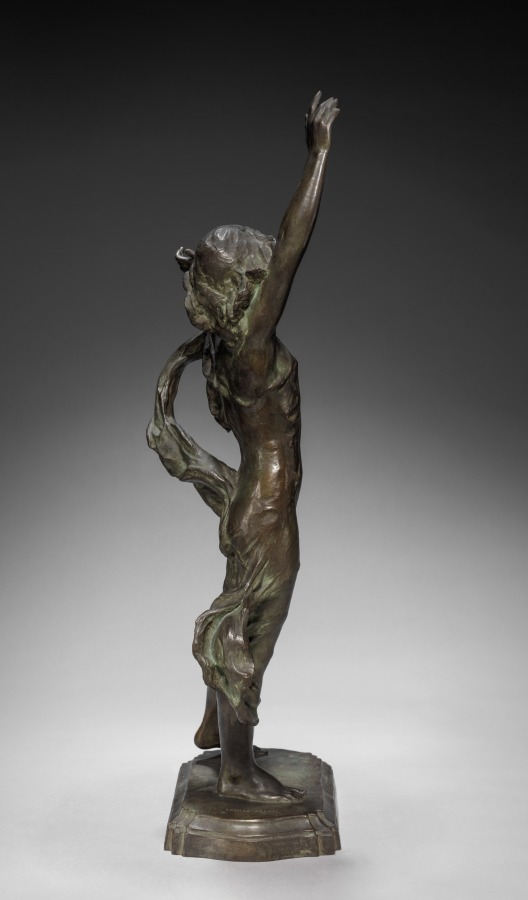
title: Pippa Passes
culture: America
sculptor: Louise Allen (American, 1880–1953)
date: c. 1916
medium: bronze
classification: Sculpture